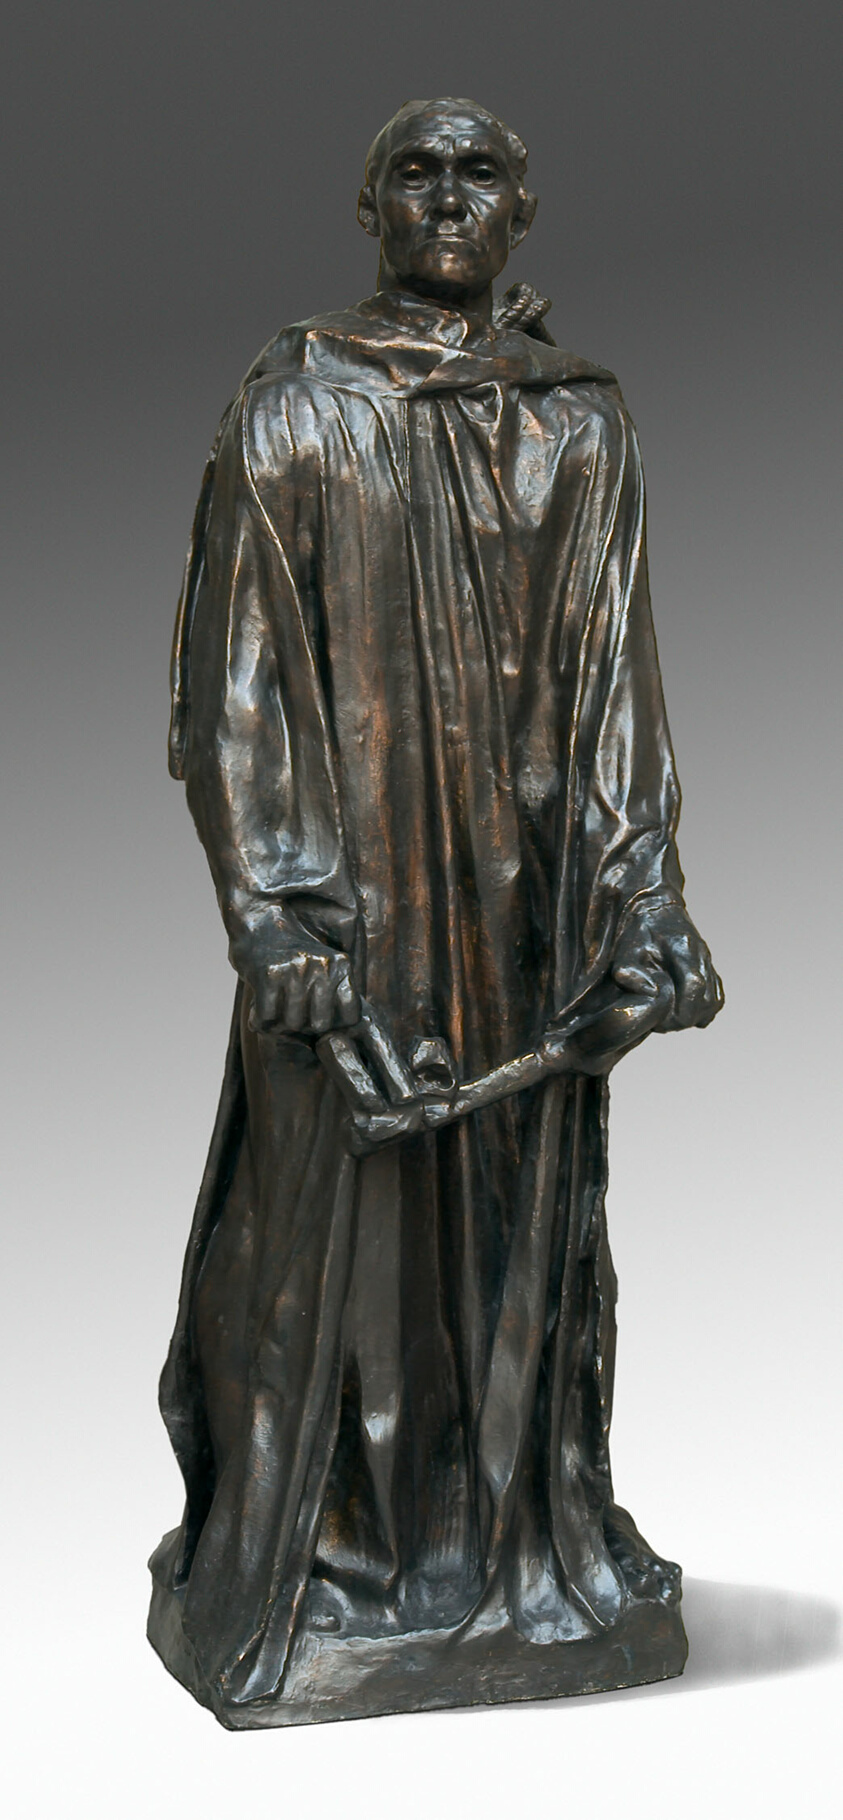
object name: Sculpture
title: A Burgher of Calais (Jean d'Aire)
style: Post-Impressionism, 19th century, nineteenth century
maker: Auguste Rodin (French, 1840–1917)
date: Modeled 1889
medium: Plaster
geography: France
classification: sculpture; large scale; figure; french; plaster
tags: men, portraits, portraits: male subject, portrait, man, figure